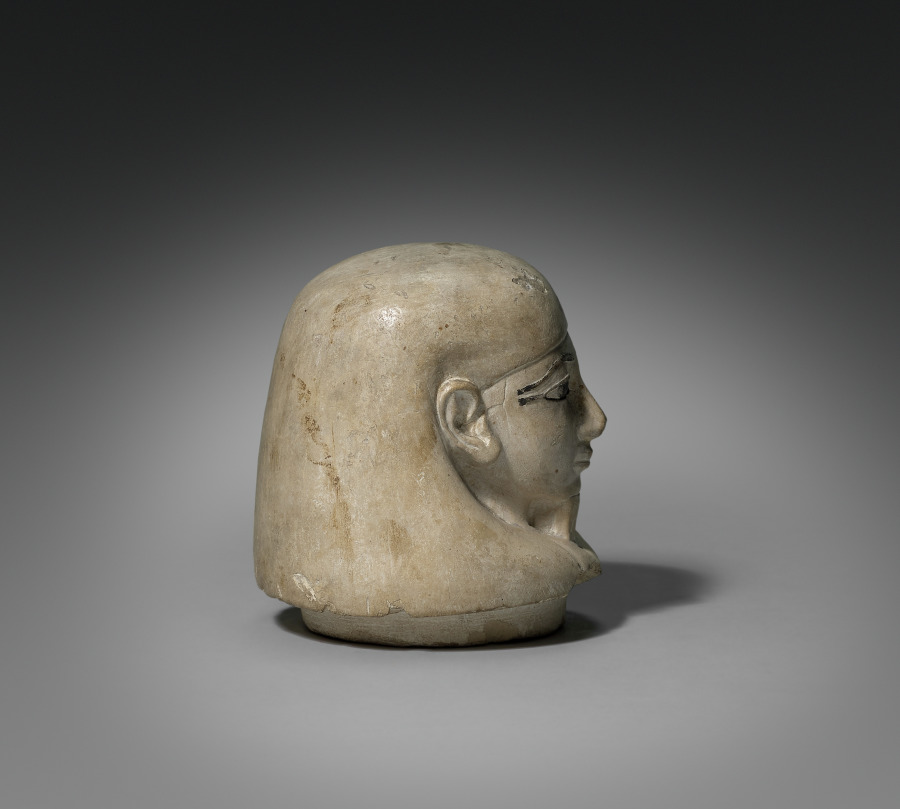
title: Canopic Jar with Lid (lid)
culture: Egypt, New Kingdom (1540–1069 BCE), Dynasty 18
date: 1540–1296 BCE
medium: limestone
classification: Funerary Equipment